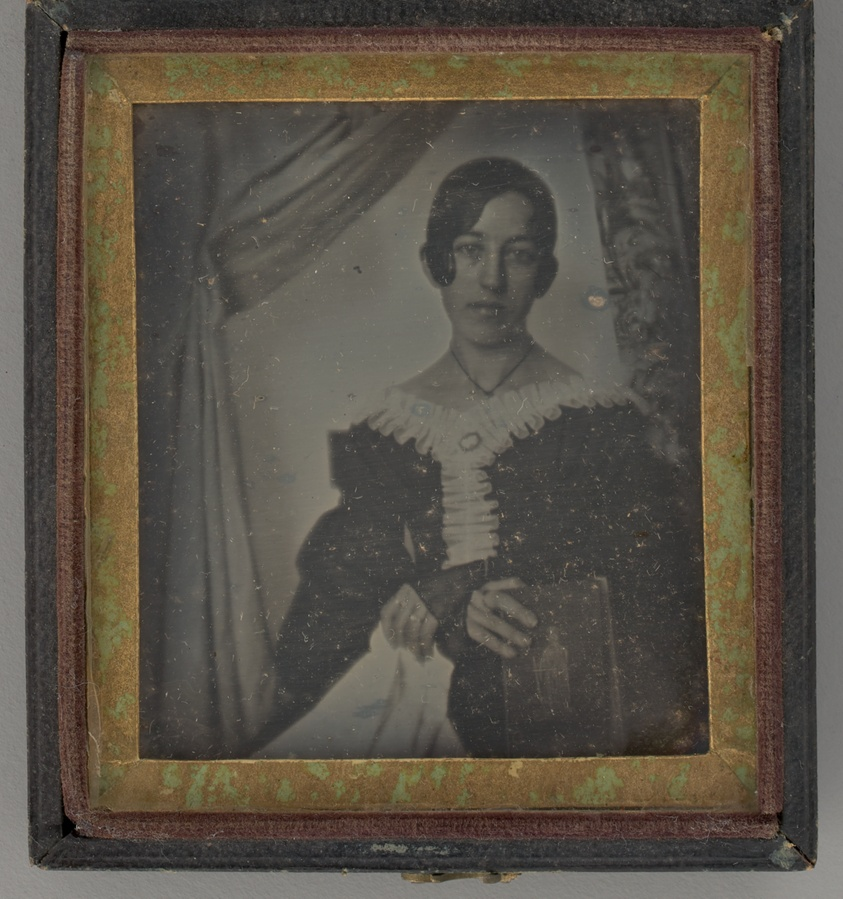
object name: Photograph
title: Untitled (Portrait of a Woman)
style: 19th century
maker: Huddleston & Co. (American, 19th century)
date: 1840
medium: Daguerreotype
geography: United States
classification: portrait; photograph; photographic process; photography; portrait; daguerreotype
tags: lundberg collection, portrait, female, portraits, portraits: female subject